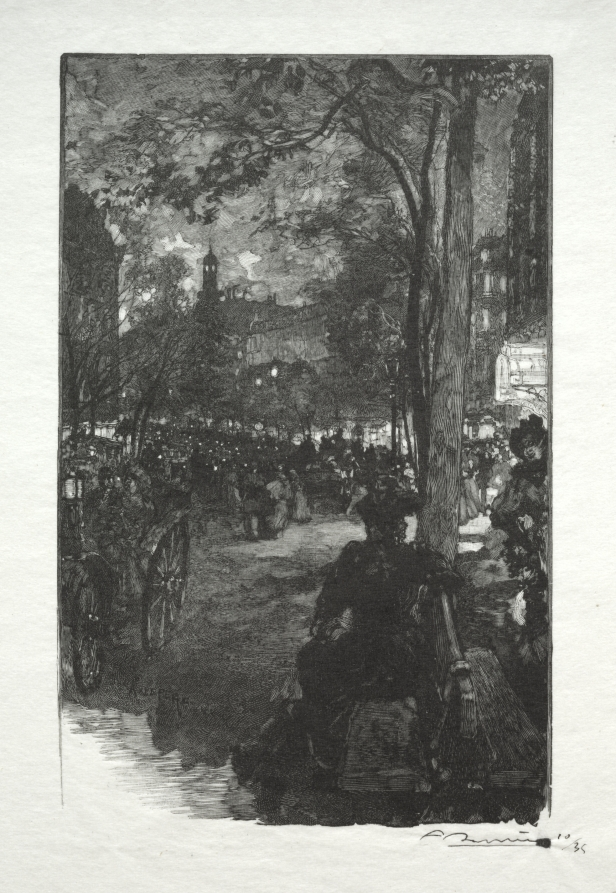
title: Le Boulevard Montmartre, le Soir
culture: France, 19th-20th century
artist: Auguste Louis Lepère (French, 1849–1918)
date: 1890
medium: wood engraving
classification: Print